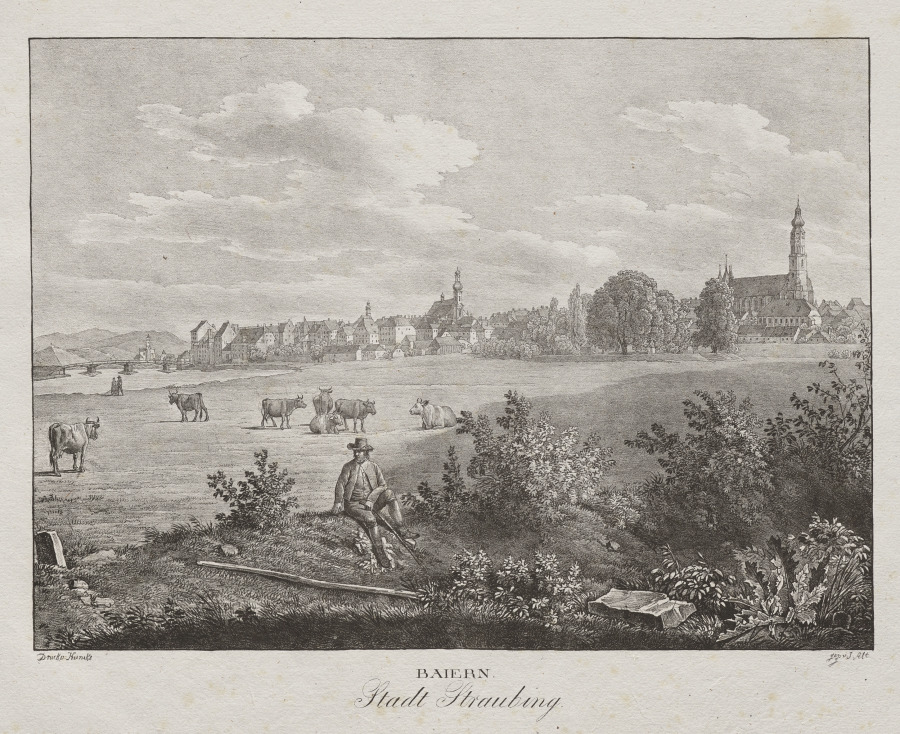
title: Baiern, Stadt Straubing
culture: Austria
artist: Jakob Alt (Austrian, 1789–1872)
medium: lithograph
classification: Print